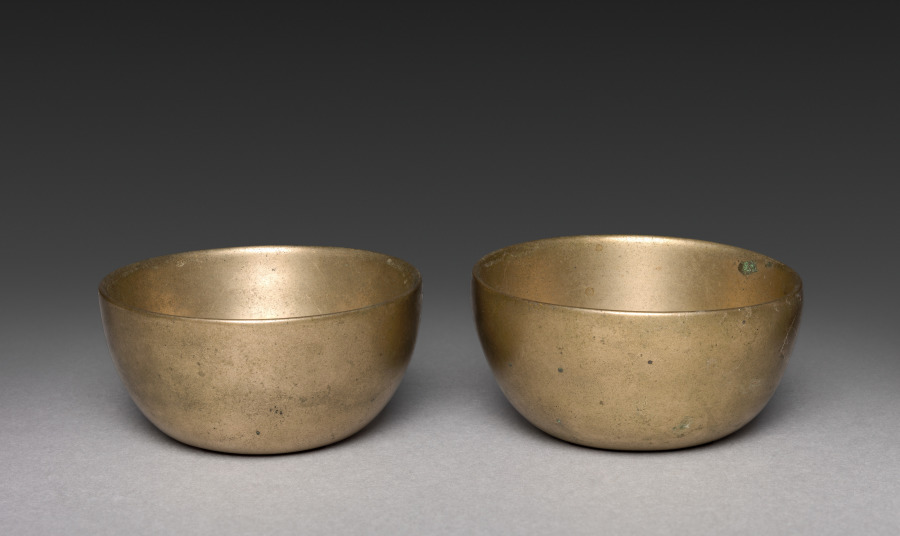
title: Wine Cup (pair)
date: unassigned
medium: brass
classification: Metalwork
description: In ancestor veneration rituals, deceased parents or ancestors are sanctified as spirits who are believed to oversee their descendants. Three times a year, once at the lunar new year, once at the person’s death date, and once at the time of the mid-autumn festival, food would be placed on the table for the ancestors, including fruits, rice, meat, and rice wine. During these ceremonies the worshipers’ attitude was as reverential toward the objects meant to embody the ancestors’ spirits as that toward a living parent. This pair of brass cups may have been used for ancestral rituals to contain rice wine.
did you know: This pair of bronze cups may have been used in family rituals such as ancestral worship ceremonies.